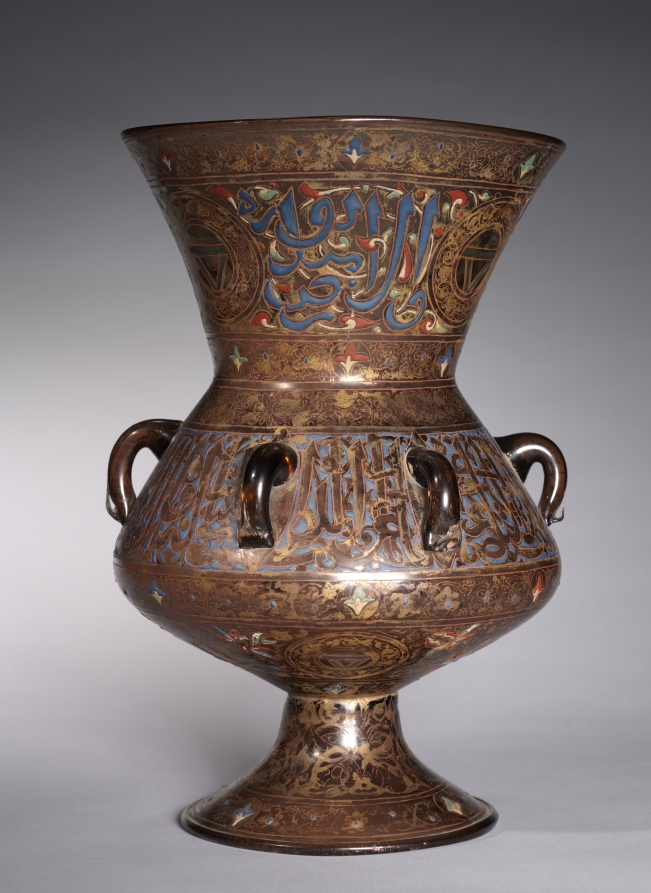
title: Mosque Lamp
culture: France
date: late 1800s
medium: glass with enameled and gilded decoration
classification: Glass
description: In late 1800s Europe, there was a renewed interest in art from the Islamic world. Mosque lamps, made for Mamluk rulers and their high officials in the 1300s, were particularly prized. Phillippe-Joseph Brocard, a Parisian collector and craftsman, is renowned for reviving the Mamluk technique of enameling and gilding glass and produced many lamp reproductions. This lamp used to be in his collection and it is possible that it was made by him. The top Qur’anic inscription likens divine light to a shining glass lamp.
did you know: This colorful lamp would have been suspended by its six handles. When lowered to refill its oil, it could stand securely on its splayed foot.